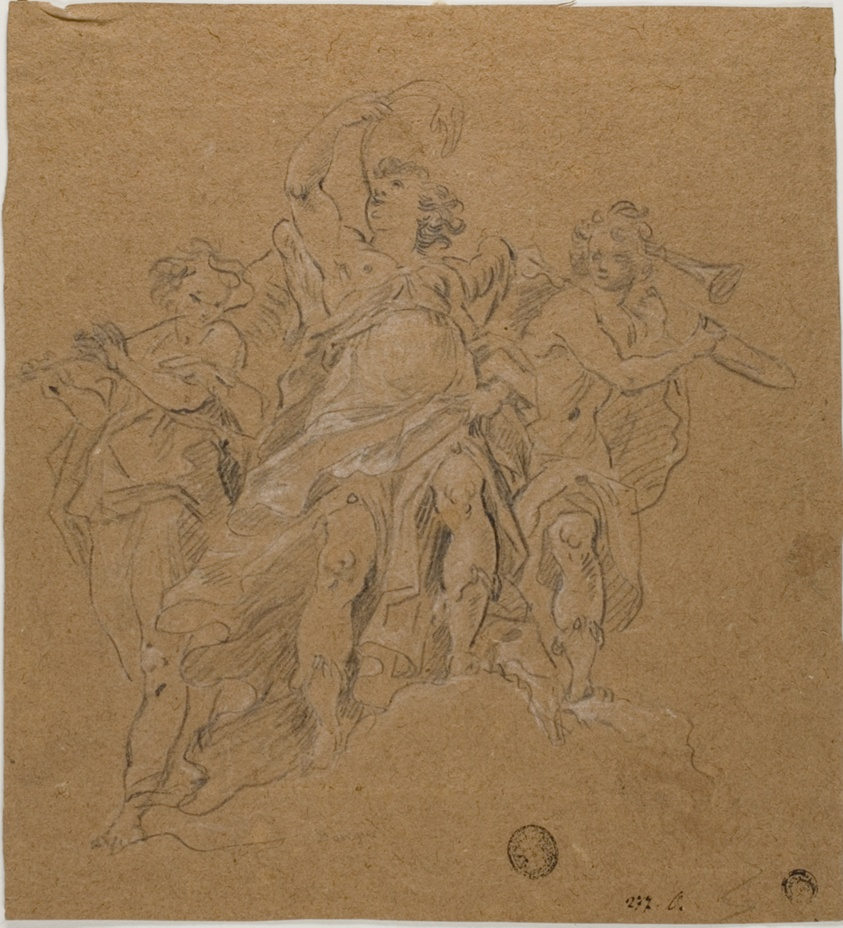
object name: Drawing and Watercolor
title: Angel Musicians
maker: Follower of Francesco Monti (Italian, 1646-1712); or the School of Parmigianino (Italian, 1503-1540)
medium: Graphite, heightened with white chalk, on reddish- brown laid paper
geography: Italy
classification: chalk; drawings (visual works); prints and drawing